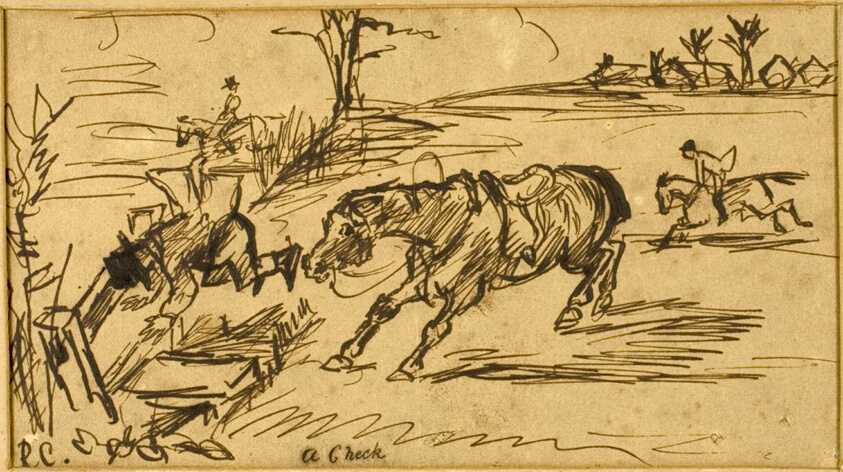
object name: Drawing and Watercolor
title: A Check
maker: Randolph Caldecott (English, 1846-1886)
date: 1869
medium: Pen and brown ink, on tan wove paper, laid down on wood pulp board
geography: England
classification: pen and ink drawings; drawings (visual works); prints and drawing